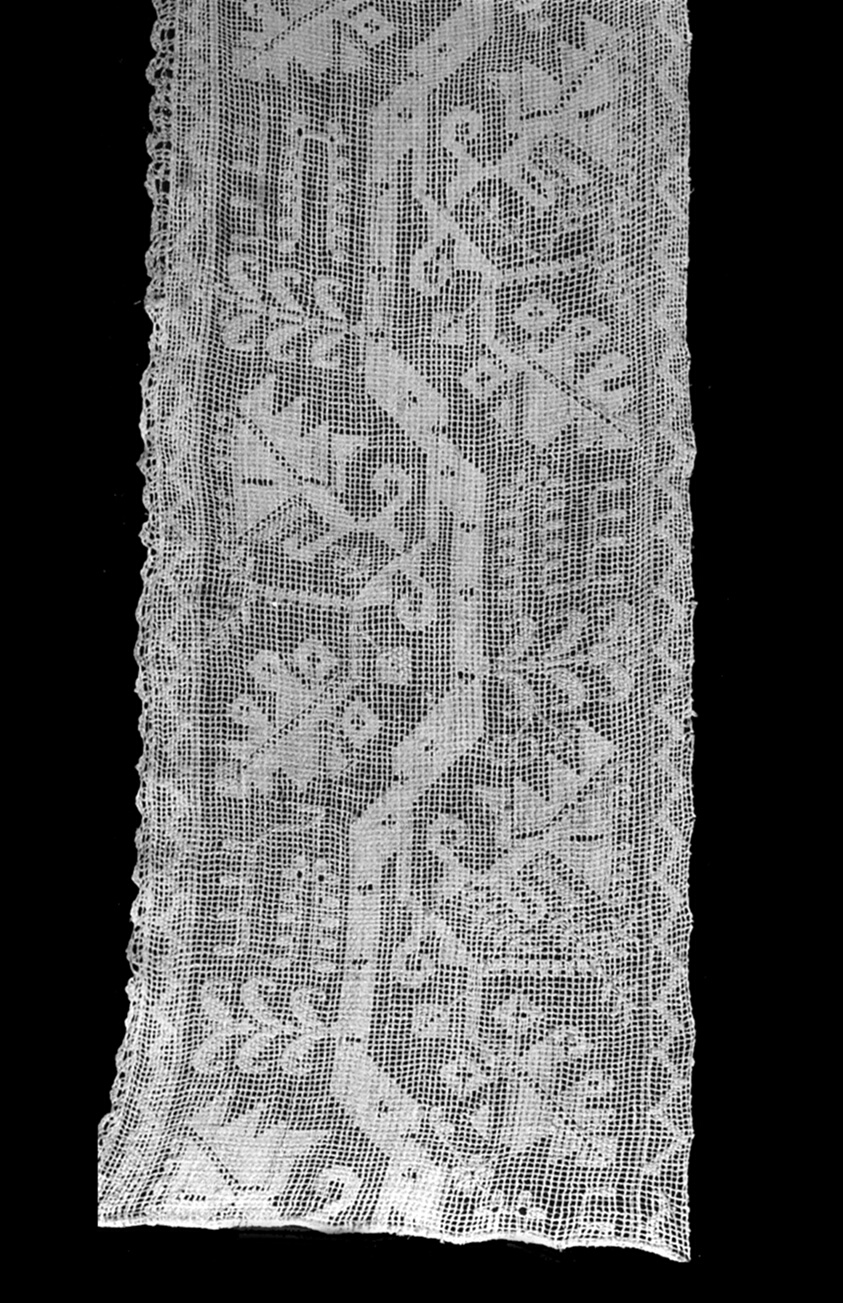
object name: Textile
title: Border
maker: Italy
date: 17th century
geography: Italy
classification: textile; needlework (visual works)